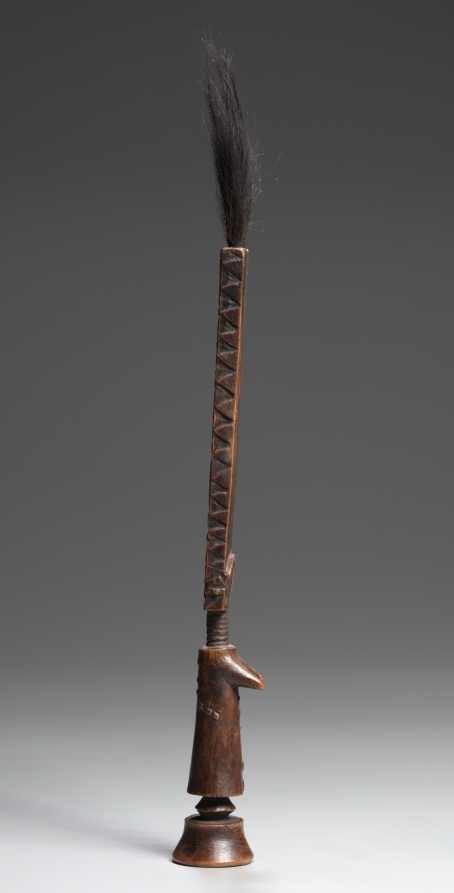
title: Female Figure (akua'ba)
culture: Africa, West Africa, Ghana, Fante-style maker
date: late 1800s–early 1900s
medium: Wood, hair, resin, and bone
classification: Sculpture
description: An infertile woman would be advised by a priest to commission such a sculpture and care for it as if it were her baby. With the aim to induce fertility, or to ensure the birth of a healthy and beautiful daughter, the akua'ba figure is carried on the woman's back inside her wrapper. After a successful birth, the figure is placed in the priest's shrine as an offering, or it is given to the newborn as a toy.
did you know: Akua'ba are always female, both because Akua’s first child was a girl, and because the Akan and Fante societies are matrilineal, meaning that it is women that extend the family line.